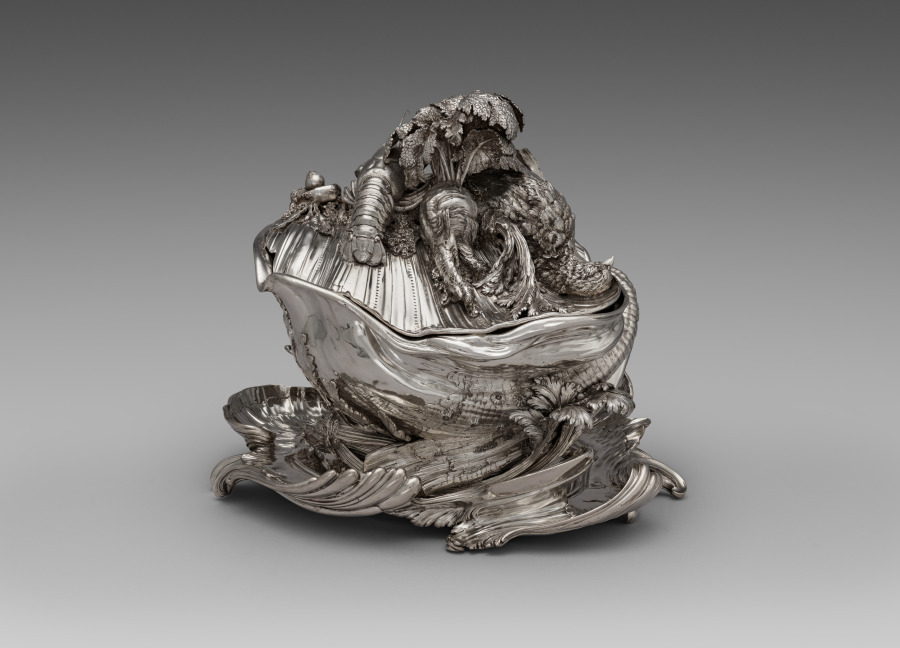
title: Covered Tureen on Stand (Pot-à-oille)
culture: France, Paris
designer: Juste-Aurèle Meissonnier (French, 1695–1750)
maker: Pierre-François Bonnestrenne (French)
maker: Henry Adnet (French, 1745)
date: 1735–38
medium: silver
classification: Silver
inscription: [Maker’s mark of Pierre−François Bonnestrenne, beneath platter; inside tureen (two marks)]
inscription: [Warden's mark for Paris, 1734−1735, beneath platter; inside tureen; inside cover]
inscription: [Charge mark of Hubert Louvet, Paris, 1732-1738, on platter border; beneath platter; beneath tureen; inside cover; inside tureen (two marks)]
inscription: [Discharge mark of Louis Robin mostly used for stamping small work, Paris 1738−1744, on platter border; beneath tureen]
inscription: [Warden's mark for Paris, 1736−1737, on platter border]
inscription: [Possibly British import mark, London, 1925, on platter border]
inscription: [Possibly mark of the British firm Charles & Richard Comyns, on platter border]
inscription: [Discharge of Louis Robin mostly used for stamping gold and silver between 1738 and 1744, beneath tureen; outside cover]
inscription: [Maker’s mark of Henry-Guillaume Adnet, inside cover]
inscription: [Two small undefined marks, inside cover]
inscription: [Under the surface of the platter the engraved signature]: “FAIT-PAR-I-A-MEISSONIER-ARCHITECTTE”; [and the weight] “673=5"; “No. [v] I 50 £ b76Sol”; [and the numbers] “A nº 1”; “A nº2”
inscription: [On tureen lip]: "MEISSONIER"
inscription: [On tureen lip]: “A nº 3”; “A nº2” [in order to place the tureen correctly on the stand]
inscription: [Numbers engraved on the stand, the tureen, and the cover to show how the piece should be assembled]: “A nº 1” [on the base of the tureen; beneath the cover; on the platter], “A nº 2” [on the platter], “A nº 3” [on the exterior rim of the tureen], “A nº4”; “A nº 5” [outside the cover], “A nº 7” [on the border of the platter]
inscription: [Two warden's marks for Paris, 1735-1736, beneath tureen]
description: This tureen exemplifies the French Rococo style, an artistic movement celebrating naturalistic forms that developed in Paris during the early 1700s. In contrast to classical, controlled symmetry, Rococo forms morph, twist, and spill into the space around them. Meissonnier embellished this tureen in a picturesque arrangement of vegetables and creatures, transforming a utilitarian object into a decadent display of wealth and abundance. This masterpiece comes from a set of two tureens commissioned by the English Duke of Kingston during an extended stay in Paris in the 1730s.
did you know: The langoustine, pigeon, and vegetables were cast using real examples giving the silver copies lifelike detail and appearance.